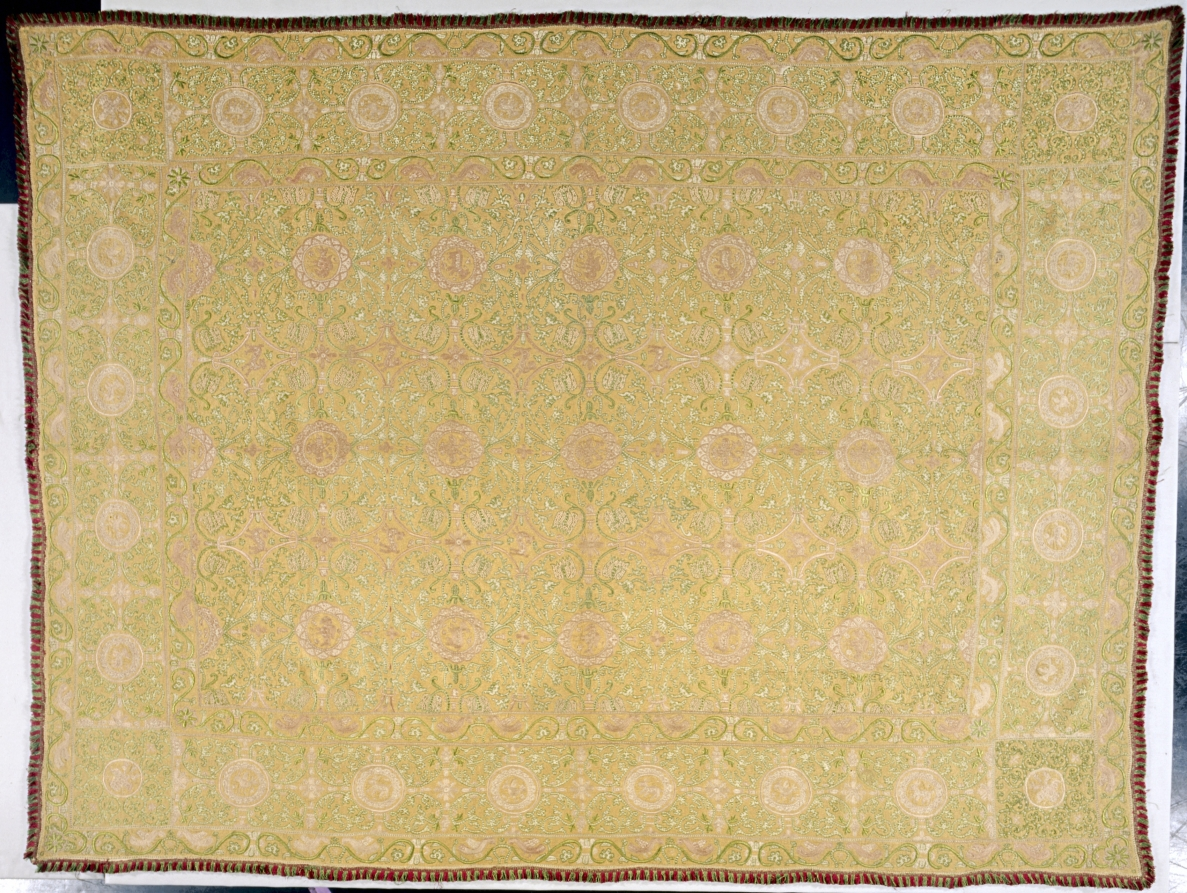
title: Embroidered Bedspread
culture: Portugal, 17th-18th century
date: 17th-18th century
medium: embroidery; silk on linen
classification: Embroidery